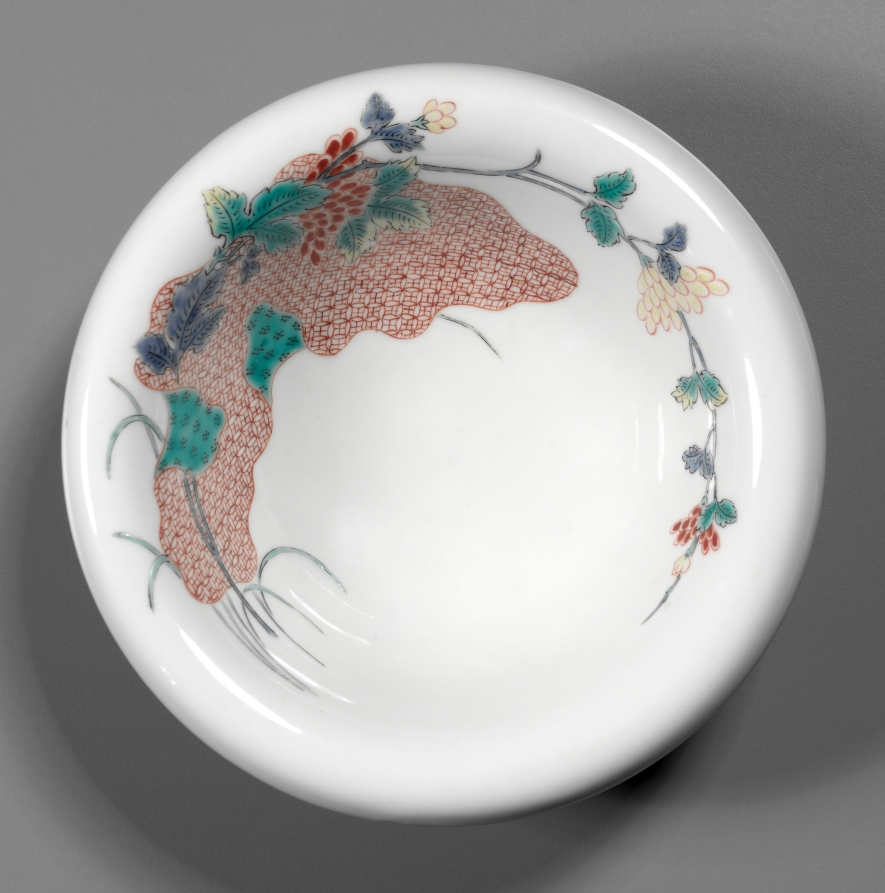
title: Bowl with Floral Spray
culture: Japan, Edo period (1615–1868)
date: early 1700s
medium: One from a set of bowls; porcelain with overglaze color enamel (Hizen ware, Kakiemon type)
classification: Ceramic